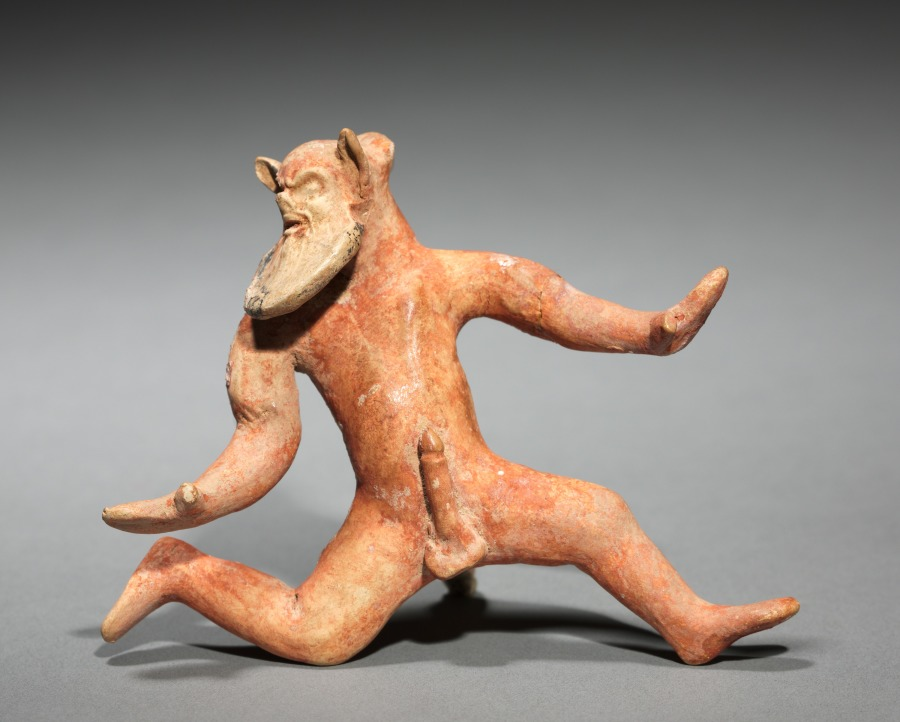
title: Dancing Satyr Group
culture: Greece, Boeotia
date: 500–475 BCE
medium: painted terracotta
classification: Sculpture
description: Part man and part beast, satyrs were mythical woodland creatures. In art, they were depicted with the ears and tail of a goat or horse, sometimes with hooves, and in a high state of sexual arousal. Satyrs often accompanied Dionysus, the god of wine, in his drinking bouts and other escapades. These three probably once decorated the rim of a large punch-bowl-shaped vessel for serving wine.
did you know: Satyrs, or lustful, drunken woodland gods, are the biggest partiers in ancient Greek mythology.